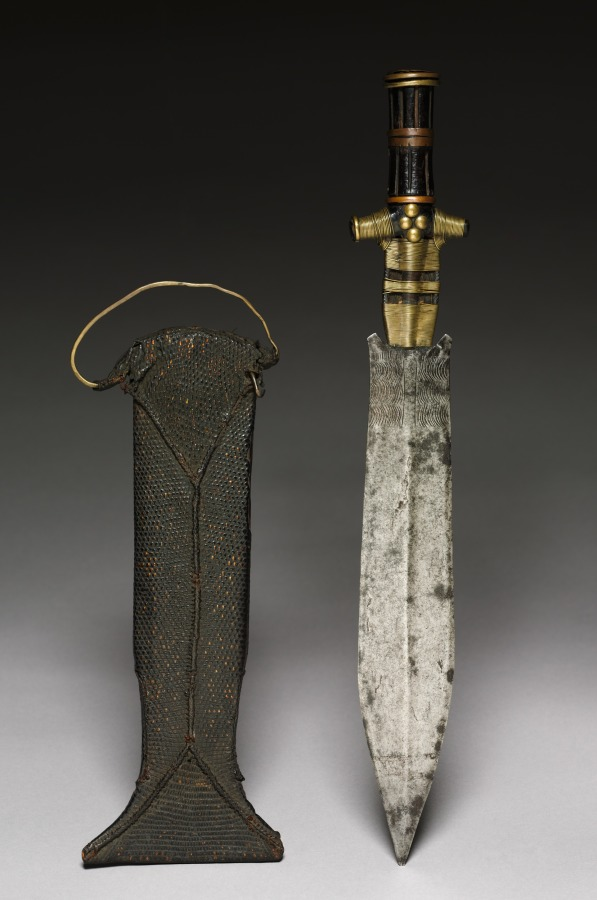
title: Knife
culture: Africa, Central Africa, Democratic Republic of Congo, unknown maker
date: 1800s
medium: Iron, wood, copper alloy, reptile skin, leather or rawhide, and upholstery studs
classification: Arms and Armor